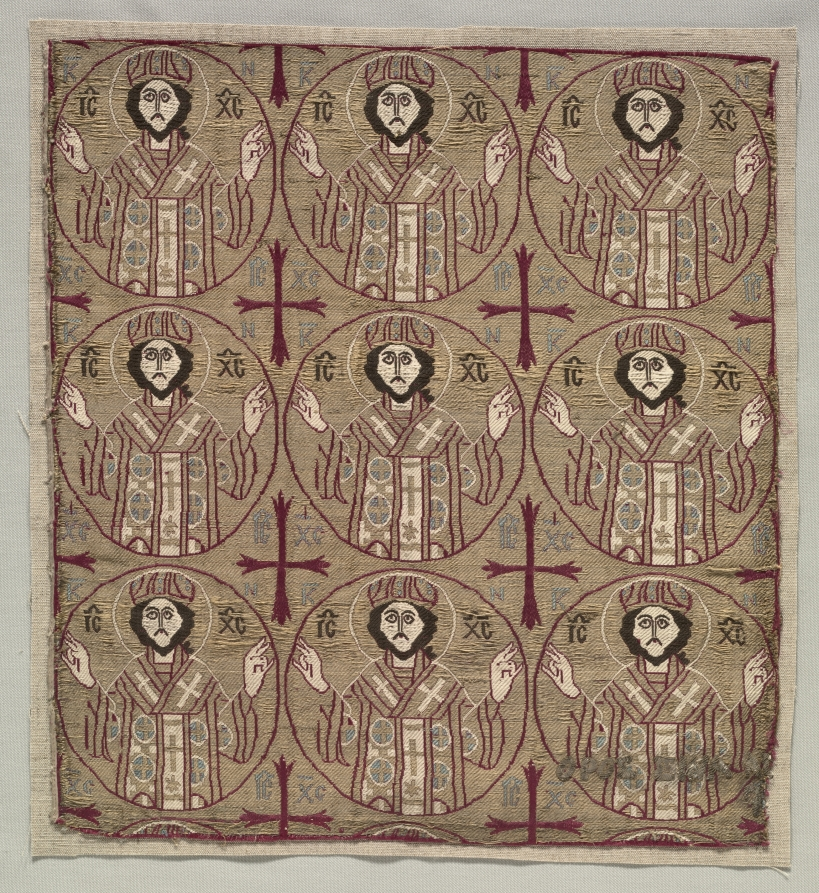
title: Lampas with roundels of the image of Christ in benedictory pose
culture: Turkey, Bursa, Ottoman period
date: 1550–1650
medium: Silk and gilt-metal thread: lampas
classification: Textile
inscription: Inscription around the crosses: "IC" (Iesus), "XP" (Christos), "N K" (Kyrios).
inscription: Greek inscription in lower corner in silver thread: "OPOC CINA" (Opus Sina).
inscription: Inscription in the roundel flanking Jesus's halo: "IC XC" (Jesus Christ).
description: Ottoman manufacturers also wove luxury silks with Christian images for the largest markets outside of the reigning sultans, whose need for luxury fabrics was voracious, targeting the Balkans, Eastern Europe, and the state of Muscovy (Moscow), which lacked silk industries. Worn as majestic church vestments, they were prized signifiers of the power and wealth of the Eastern Orthodox church. Christian imagery is often displayed in small medallion patterns, as seen here, woven in the standard Ottoman lampas technique. In this highest grade lampas with extensive gilt-metal thread, small medallions enclose half-length images of Christ in a benedictory pose alternating with crosses. The abbreviated inscription in the roundel, IC XC, translates as "Jesus Christ."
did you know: Around the crosses in silver thread is the inscription, IC XC N K meaning "Jesus Christ Victorious."